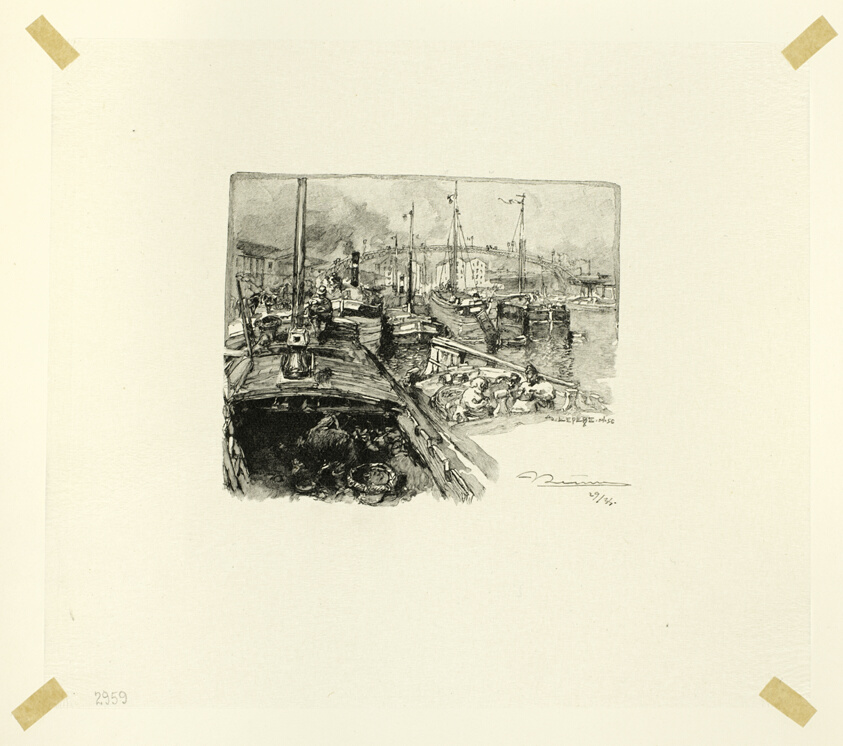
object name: Print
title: Villette Dock, plate five from Le Long de la Seine et des Boulevards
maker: Louis Auguste Lepère (French, 1849-1918); published by A. Desmoulins (French, active c. 1908-1910)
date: 1890, published 1910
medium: Wood engraving in black on cream Japanese tissue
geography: France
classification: wood engraving; print; prints and drawing